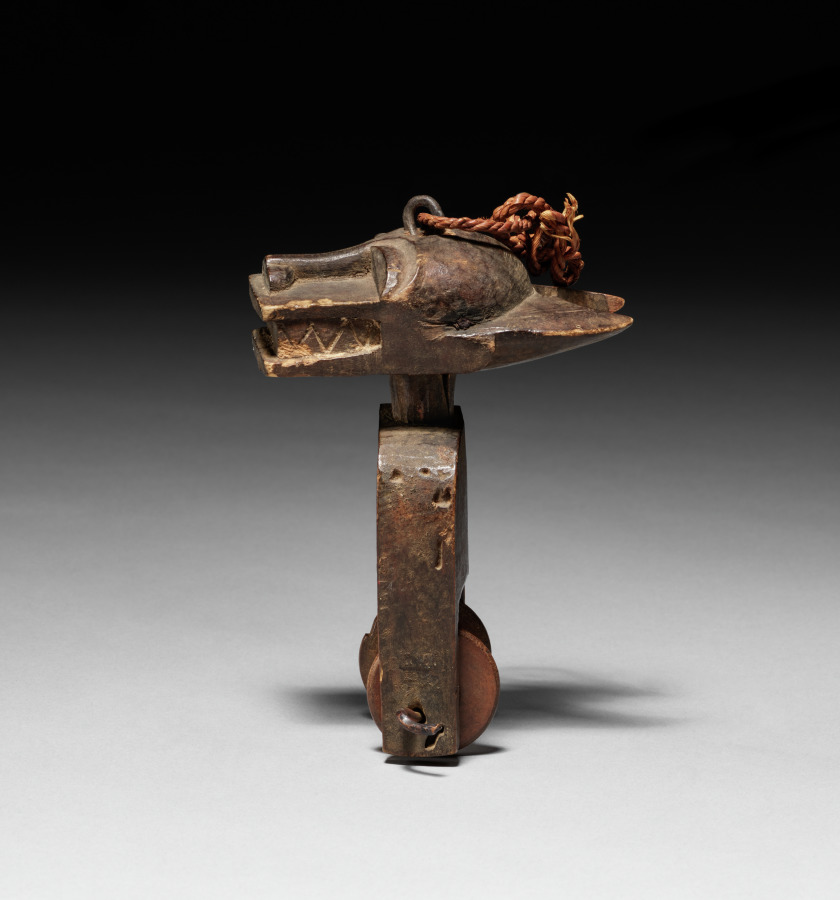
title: Heddle Pulley (Bo Nun Amuin mask)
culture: Africa, West Africa, Côte d’Ivoire, Baule-style carver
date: 1900s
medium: Wood, metal, and plant fiber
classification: Implements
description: The heddle pulley, a working element of a narrow-band loom, bears a miniature sculpture. Heddle pulleys support and separate threads during weaving. Mounted above the weaver, the pulleys allow him to glance up at an object of inspiring beauty, rather than pure functionality. This pulley depicts a face mask, a secular usage of a typically sacred mask type.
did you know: This heddle pulley depicts a fearsome Bo Nun Amuin mask that recalls nature spirits.